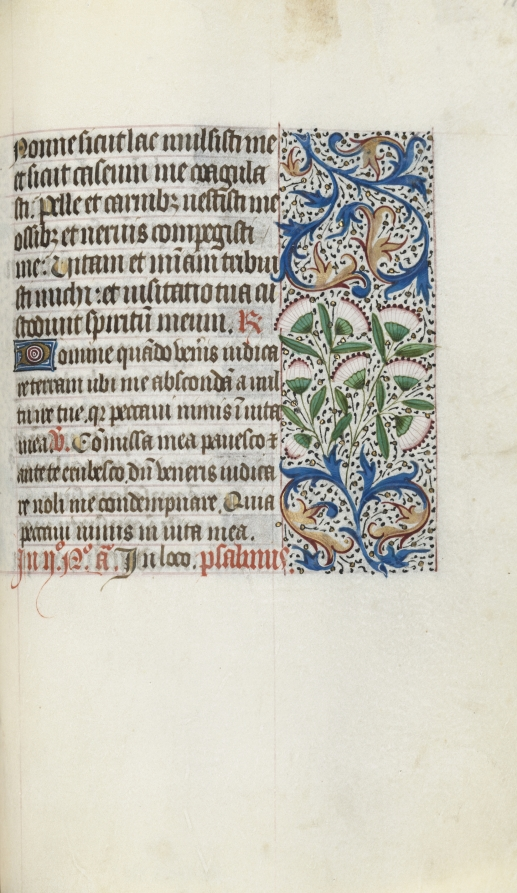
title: Book of Hours (Use of Rouen): fol. 117r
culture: France, Rouen, 15th century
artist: Master of the Geneva Latini (French, active Rouen, 1460–80)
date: c. 1470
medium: ink, tempera, and gold on vellum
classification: Bound Volume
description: In the late 1400s and early 1500s Rouen was an established and important center of book production. The city’s cathedral had a wealthy chapter that spent large sums of money to commission books and to maintain its extensive library. The stationers and booksellers would have likely been concentrated in or near the cathedral precinct. This artist, named after a manuscript now in Geneva, was Rouen’s principal illuminator during the second half of the 1400s.